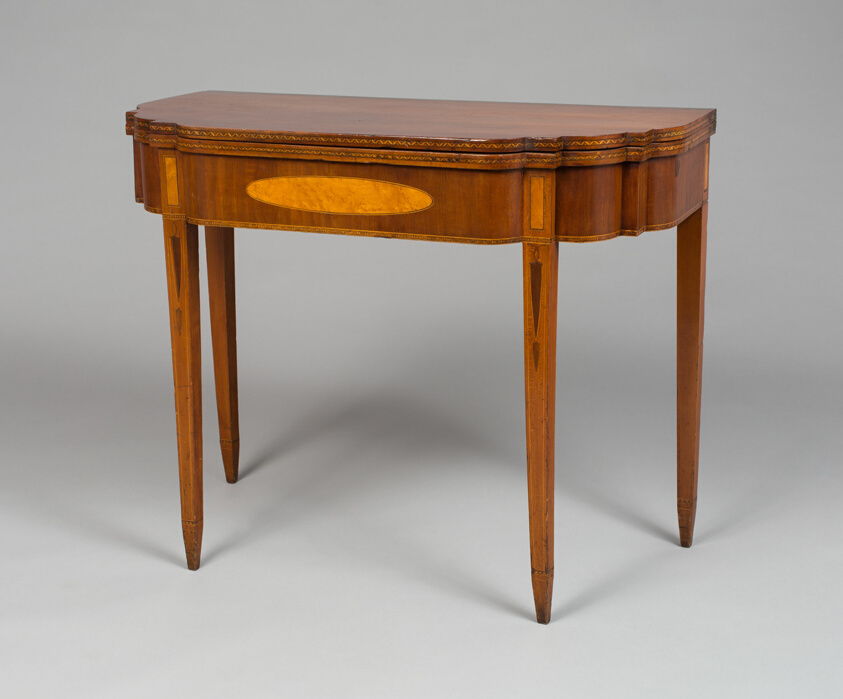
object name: Furniture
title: Card Table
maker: Artist unknown (American, 19th century); Chester, Vermont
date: 1816–30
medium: Cherry with Bird's-eye maple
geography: Chester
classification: table; furniture; american decorative arts; american arts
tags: furniture